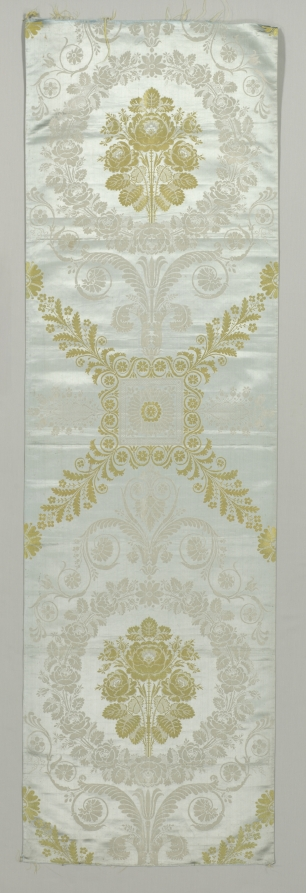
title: Length of Damask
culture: France, early 19th century, Empire Period (1804-1815)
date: 1804–1815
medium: damask, silk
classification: Textile